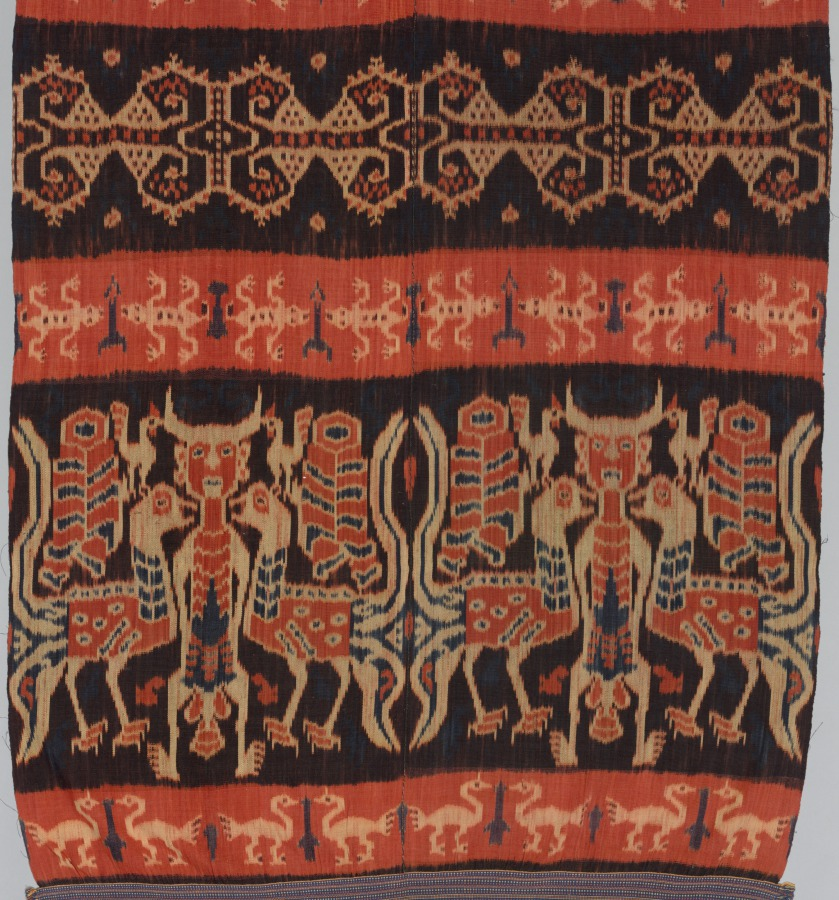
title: Hinggi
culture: Indonesia, Sumba, early 20th century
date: early 1900s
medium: cotton, ikat dyed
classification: Textile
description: On the Indonesian island of Sumba, hinggi were one of two types of textiles that were worn for ritual ceremonies and used as exchange gifts required on occasions of birth, marriage, or death. Traditionally, their designs reflect the religious and social structure of Sumbanese culture. The abstract motif in the center of this mantle represents an open shellfish, symbolic of royal power. The crocodile, seen here in the red bands to either side of the central band, is also associated with royal power as well as with Sumbanese mythology of the afterlife. The larger, standing male figures wearing horned headdresses are an extremely ancient motif, going back to the Neolithic period.